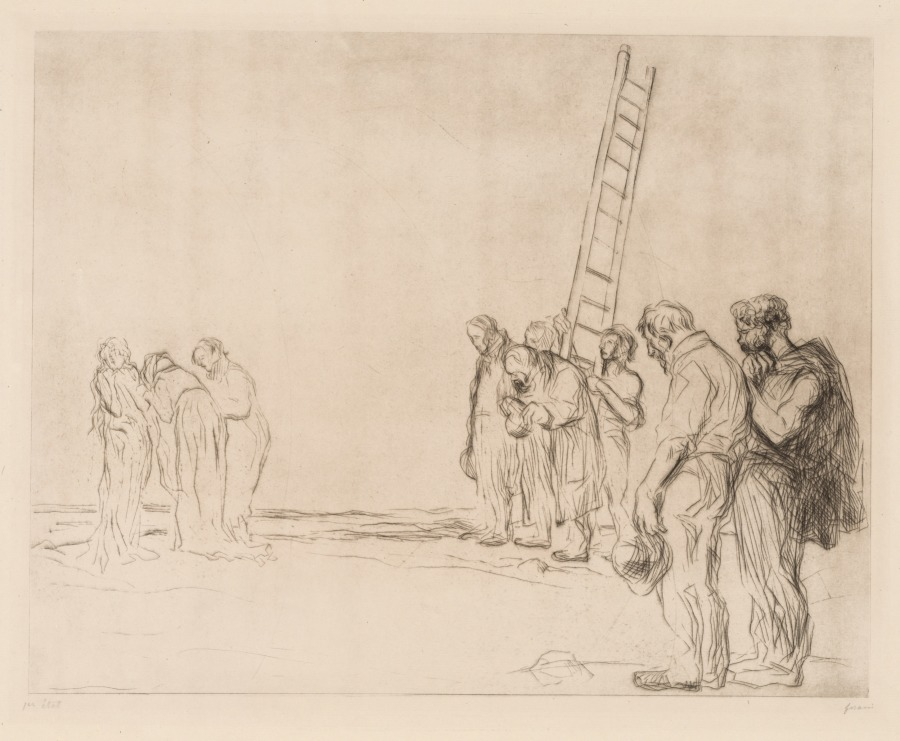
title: Calvary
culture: France, 19th-20th century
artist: Jean Louis Forain (French, 1852–1931)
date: 1902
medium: etching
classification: Print